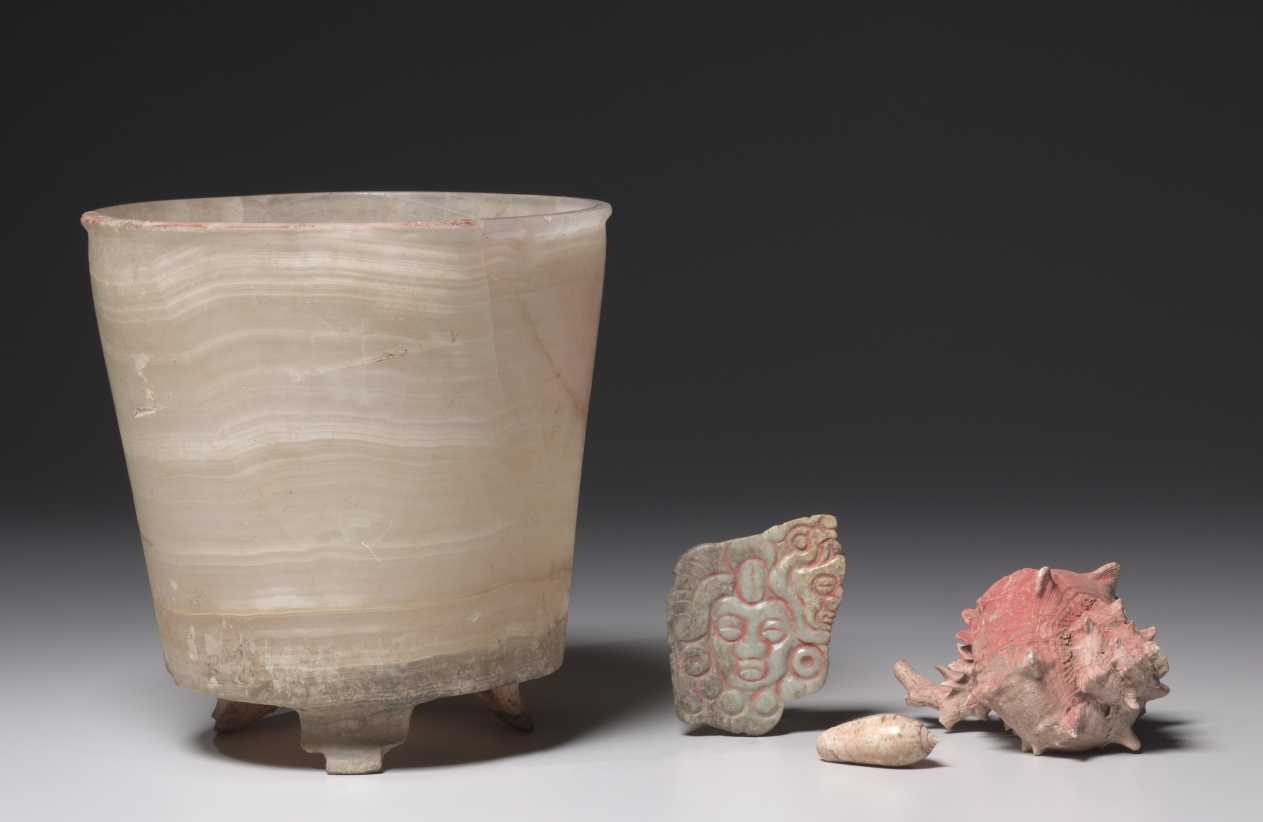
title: Offering Group: Vessel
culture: Mexico, Guerrero(?), San Jerónimo de Juárez, Xochicalco style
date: c. 800–1200(?)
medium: travertine or tecali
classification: Sculpture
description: The objects in this group, all with traces of red pigment, are said to have been found together, the shells and greenstone plaque inside the translucent stone vessel. A similar offering was found in a pyramid ornamented with feathered serpents at Xochicalco, a site south of the Valley of Mexico.